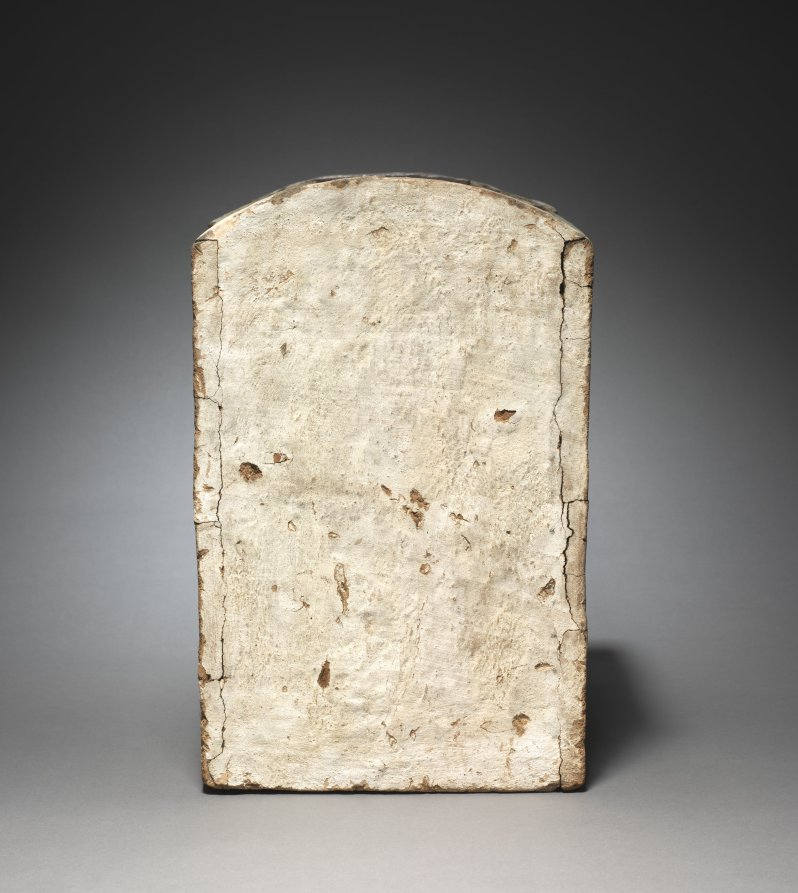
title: Shawabty Box of Bakenmut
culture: Egypt, Third Intermediate (1069–715 BCE), Dynasties 21–22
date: 1000–900 BCE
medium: gessoed and painted buckthorn wood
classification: Funerary Equipment